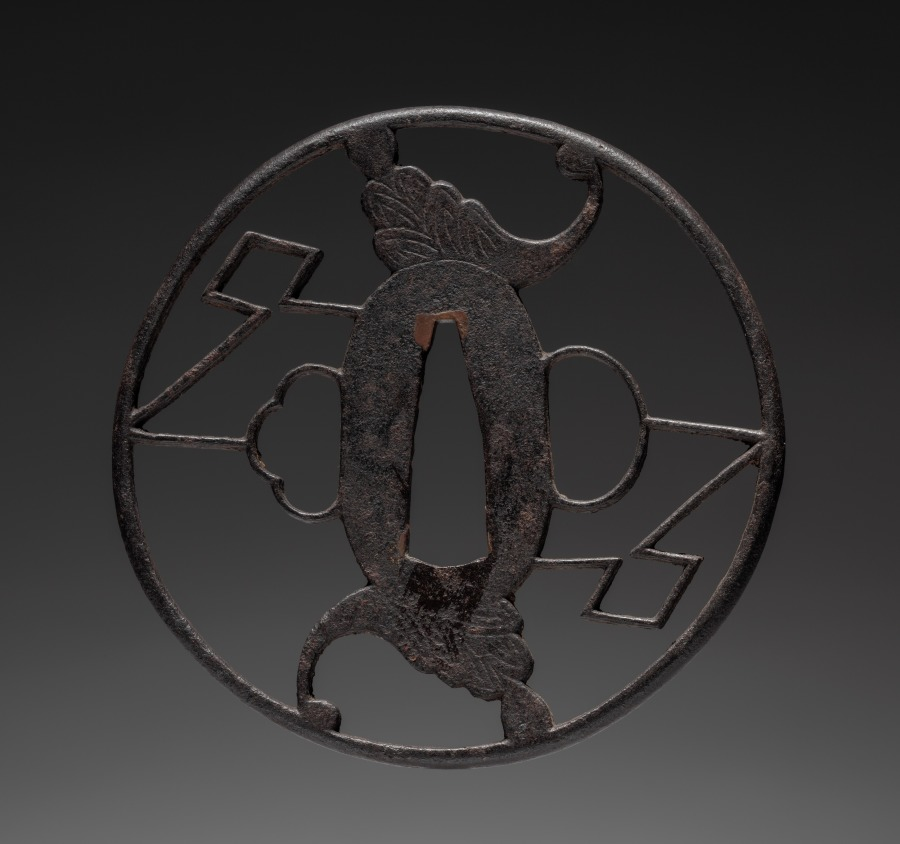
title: Sword Guard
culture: Japan, Edo period (1615–1868)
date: early to mid-1800s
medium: iron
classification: Arms and Armor